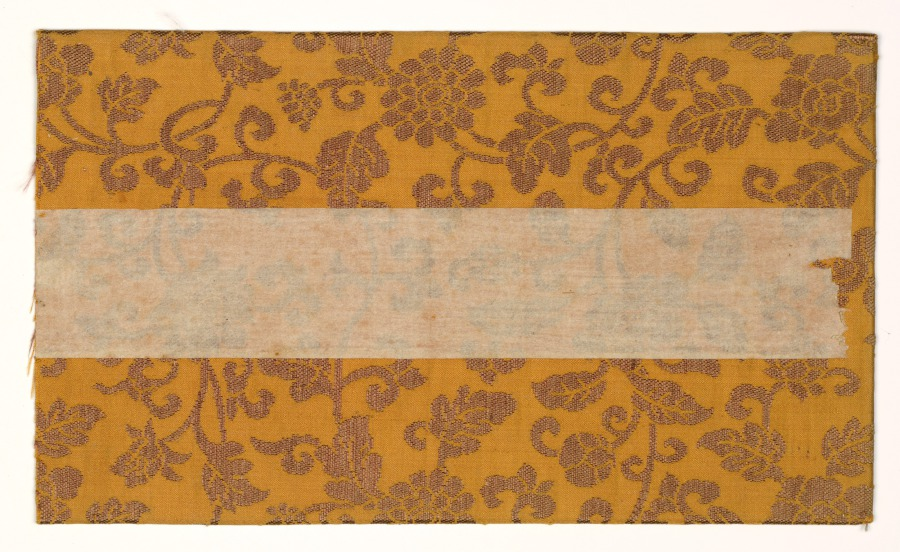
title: Textile Book Cover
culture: Japan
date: 1800s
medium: silk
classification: Textile